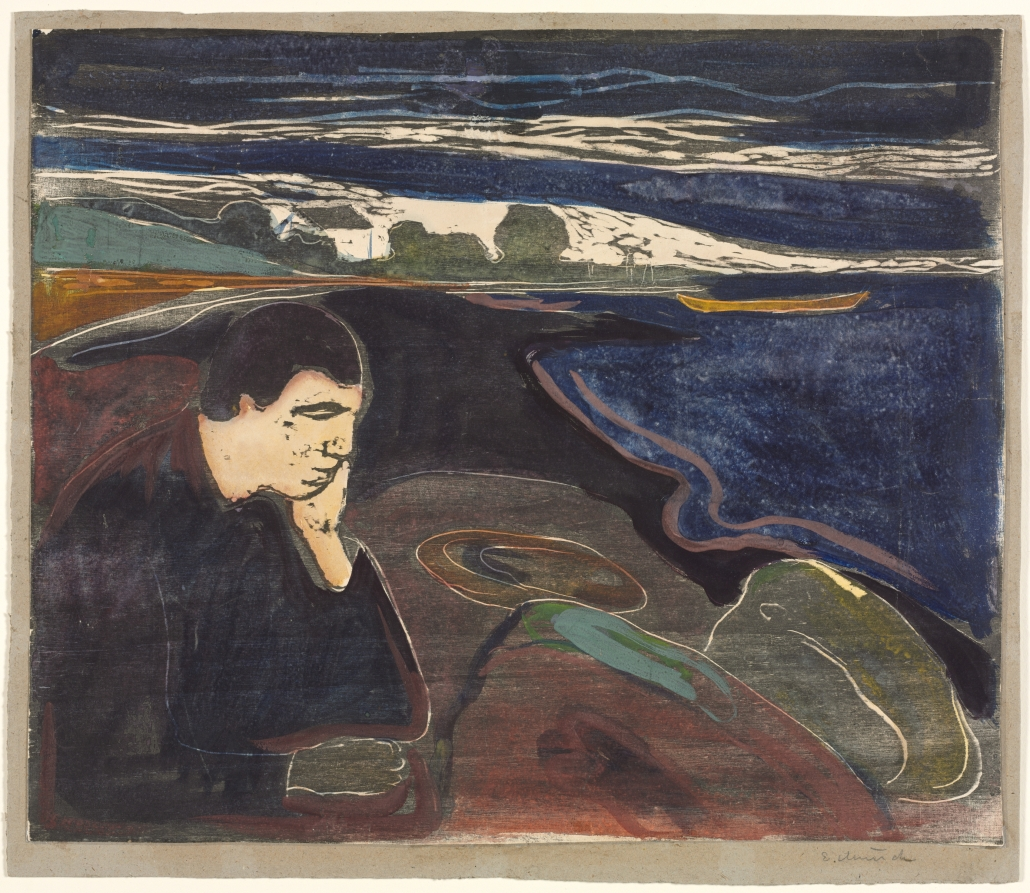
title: Evening, Melancholy I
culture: Norway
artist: Edvard Munch (Norwegian, 1863–1944)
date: 1896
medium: Hand-colored woodcut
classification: Print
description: Evening, Melancholy I depicts the jilted, tormented art critic Jappe Nilssen, Munch's friend, on the shore of Åsgårdstrand, a fishing village south of Oslo. Munch chose heavily grained blocks of wood, allowing the pattern of the board to add texture to the scene, and he exploited the handmade aspect of the technique by carving blocks crudely. He also experimented so that each impression is unique, using black ink on the woodblock and watercolor and gouache to color the sheet extensively. An example of how method can reinforce meaning, the simplified shapes, flattened space, and dark hues create a visual correspondence to the figure's deep depression.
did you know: This print is one of only two known impressions printed from the first state of the block before it was cut into two sections.